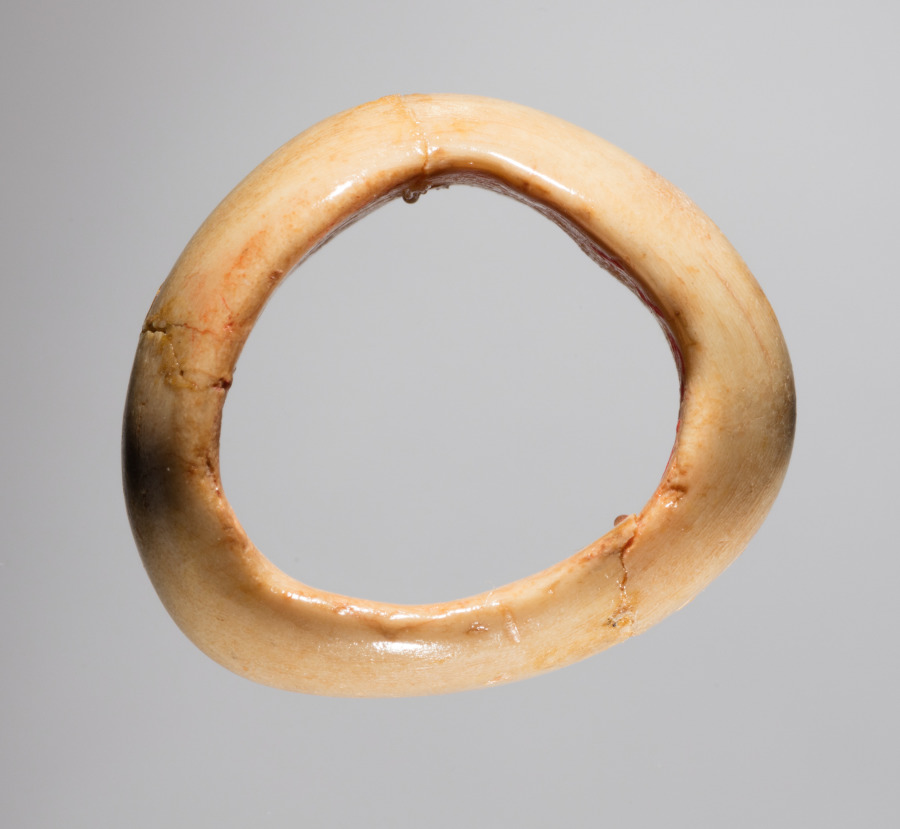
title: Ring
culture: Iran, early Islamic period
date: 700s - 900s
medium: bone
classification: Miscellaneous